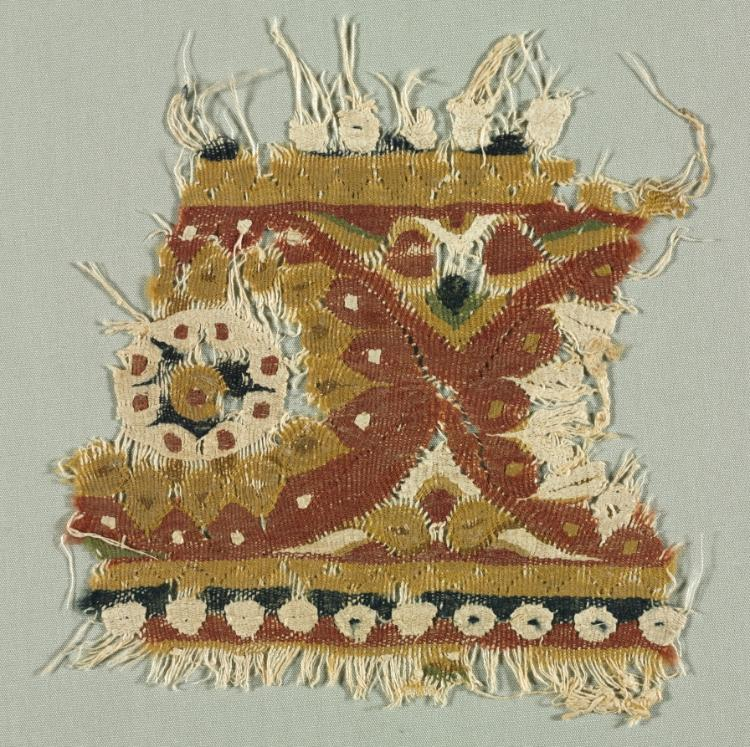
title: Fragment of a Border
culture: Egypt, Tulunid period, 9th century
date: 800s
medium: tapestry; linen and wool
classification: Textile